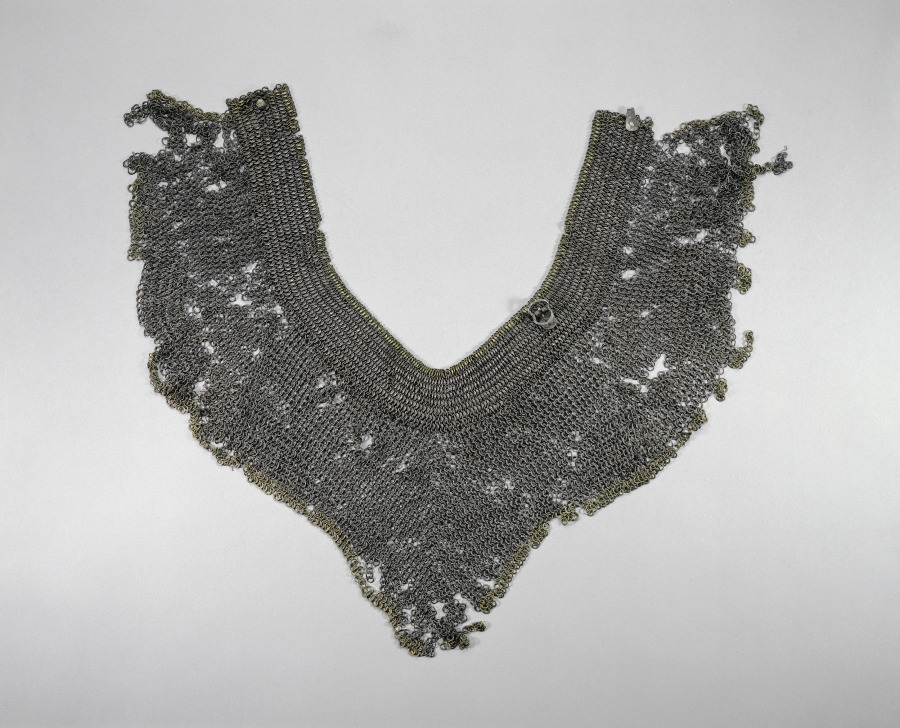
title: Collar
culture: European, 15th century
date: 1400s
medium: riveted steel rings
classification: Arms and Armor